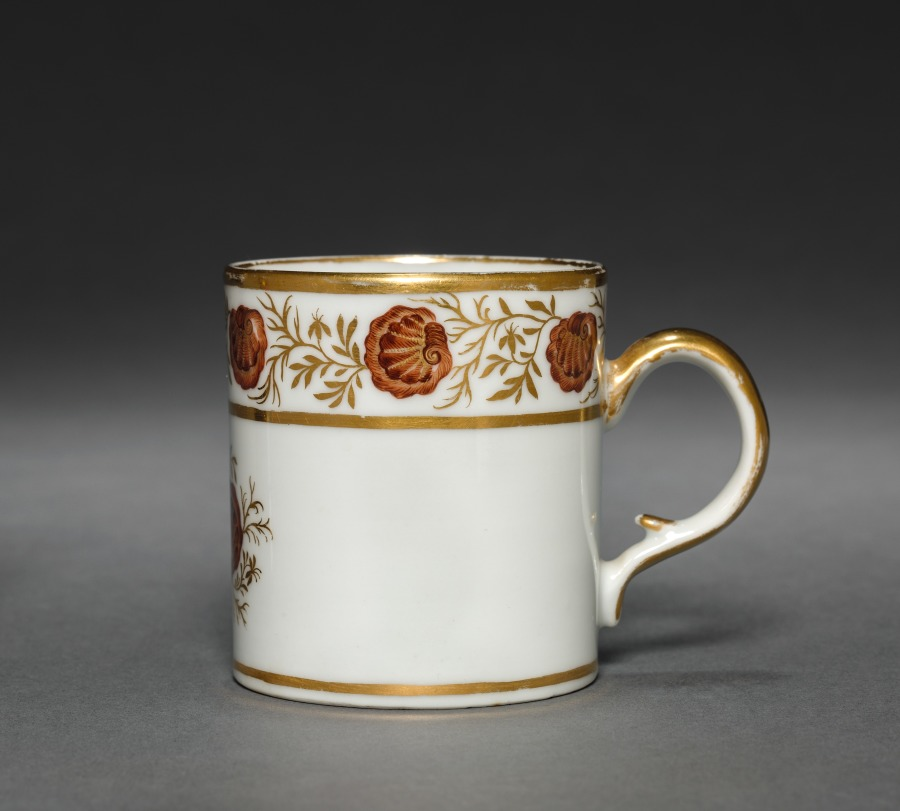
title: Cup from Oliver Wolcott, Jr. Tea Service (2 of 6)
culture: Chinese Export porcelain, late 18th-early 19th century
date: 1785–1805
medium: porcelain, sepia enamel, gold leaf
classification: Ceramic